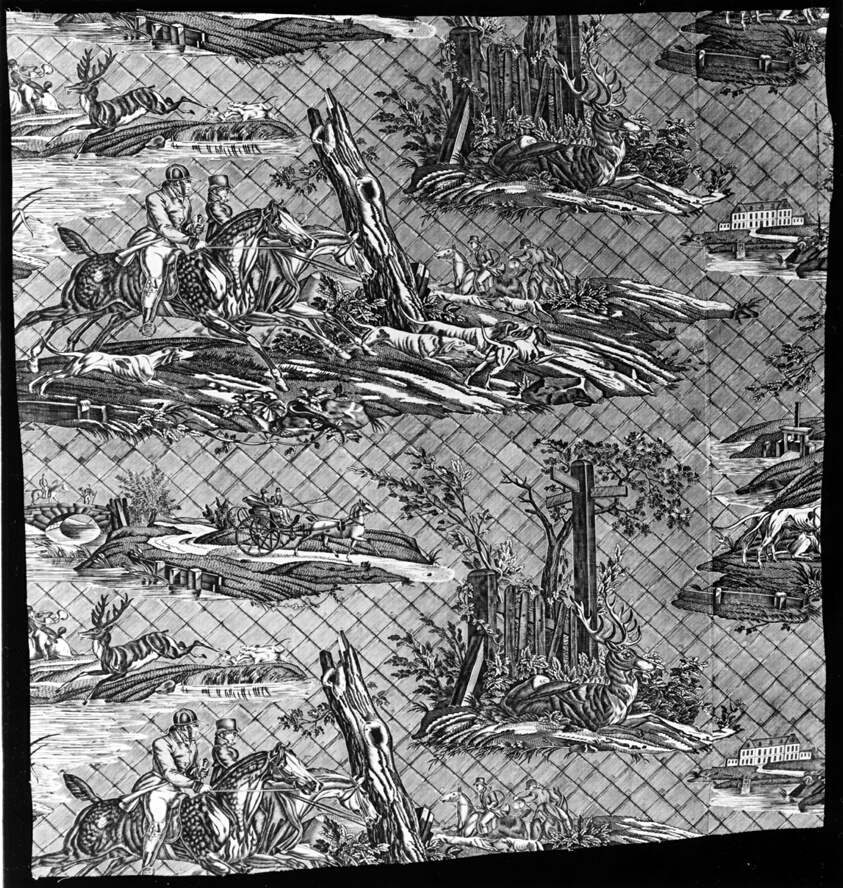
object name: Textile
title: La Route de Jouy (The Road to Jouy) (Furnishing Fabric)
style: jouy-en-Josas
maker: Designed by Horace Vernet (French, 1789–1863); Manufactured by Christophe-Philippe Oberkampf (naturalized French, 1738-1815), Oberkampf Manufactory (French, 1760-1843); Jouy-en-Josas, France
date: 1815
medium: Cotton, plain weave; copperplate printed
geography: Jouy-en-Josas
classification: textile; weaving - printed; furnishing textile